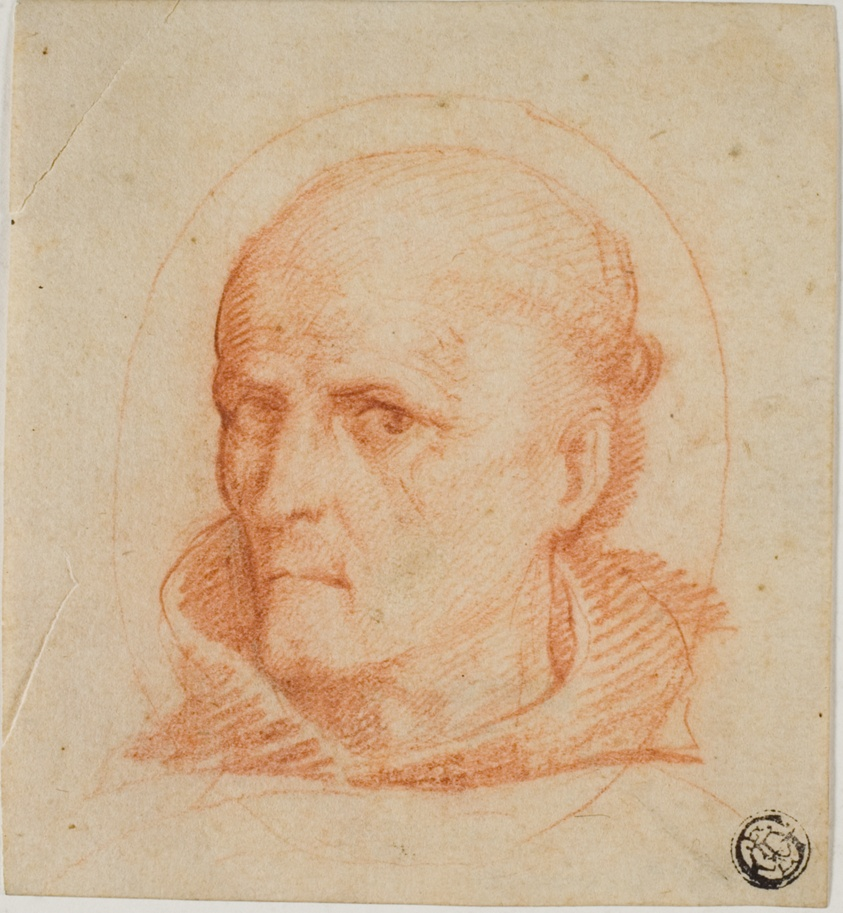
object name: Drawing and Watercolor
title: Portrait Head of Franciscan Monk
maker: Unknown Artist; Italian, 16th/17th century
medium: Red chalk on ivory laid paper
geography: Italy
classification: chalk; paper; drawings (visual works); prints and drawing